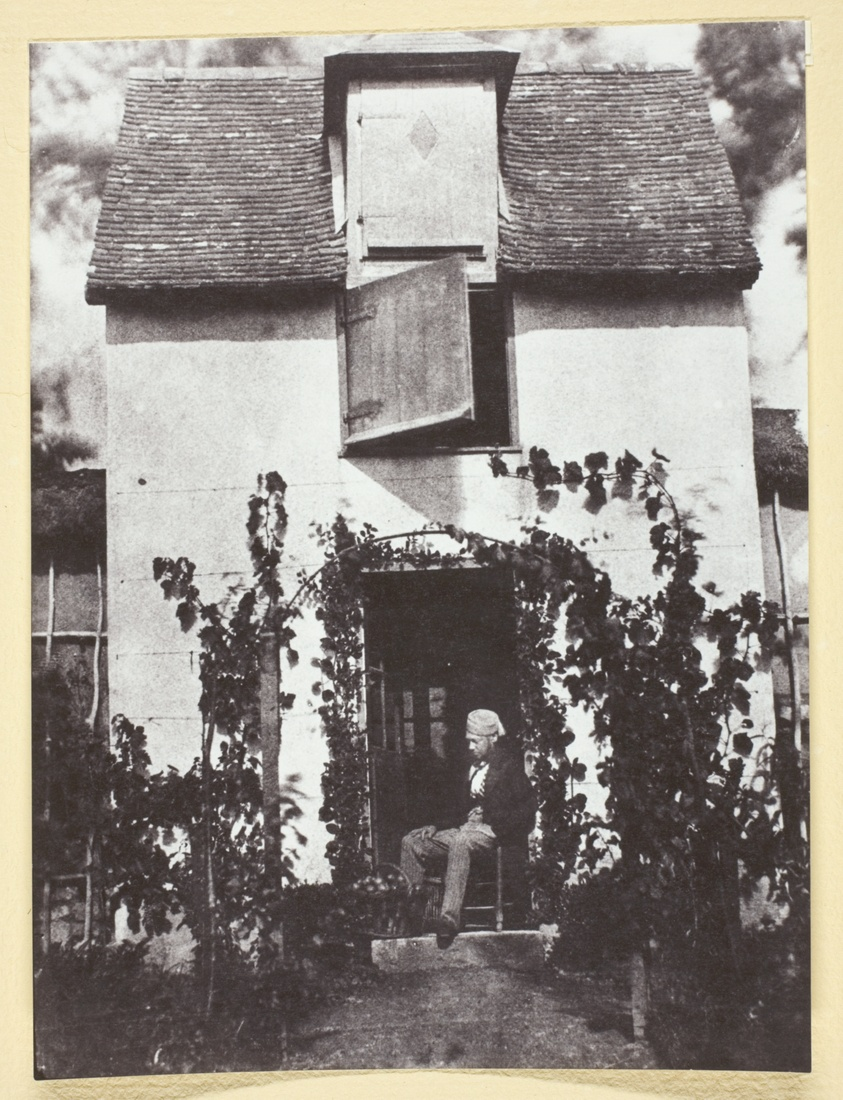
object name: Photograph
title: Bayard, Devant sa Maison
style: 19th century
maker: Hippolyte Bayard (French, 1801–1887)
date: 1842/50, printed 1965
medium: Gelatin silver print, No. 25 from the portfolio "Bayard: XXV Calotypes, 1842-1850" (1965)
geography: France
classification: photographic process; photography; photograph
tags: Collected by Hugh Edwards